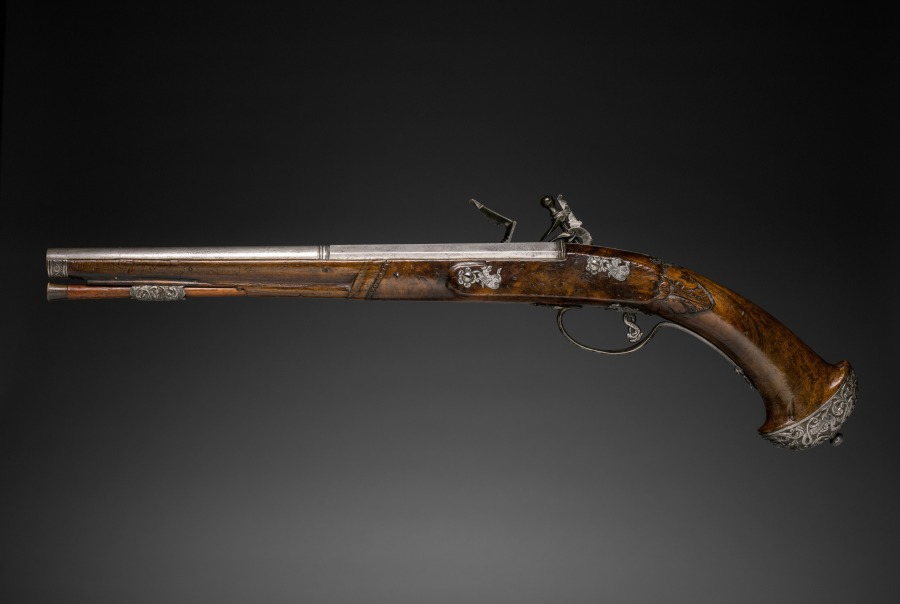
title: Flintlock Pistol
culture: Italy, Brescia, late 17th century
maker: Gio Borgognone (Italian)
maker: Lazarino Cominazzo (Italian)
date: c. 1690–1700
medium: steel, chiseled steel with walnut stock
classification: Arms and Armor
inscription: barrel signed: Lazarino Cominazzo; lockplates signed: Gio Borgognone in Bresia